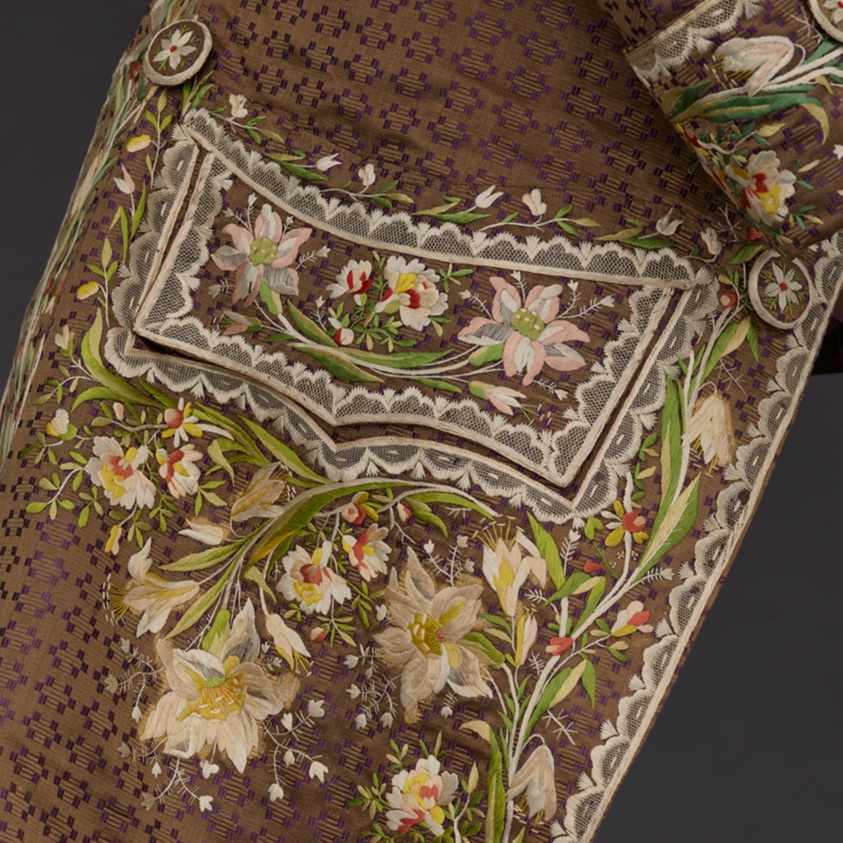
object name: Costume and Accessories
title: Man's Coat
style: 18th Century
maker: France, possibly Lyon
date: 1780s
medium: Silk, compound weave foundation; embroidered with silk threads in satin, stem and straight stitches; French knots, needle lace fillings, and slanted satin border block shading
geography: France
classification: textile; needlework (visual works); costume; dress (garment); clothing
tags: fashion, floral motifs, flowers